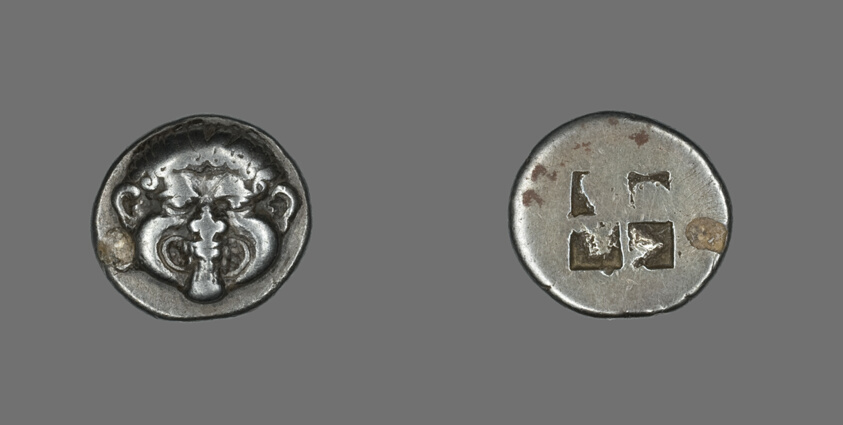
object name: Coin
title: Drachm (Coin) Depicting a Gorgon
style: greek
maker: Greek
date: early 5th century BCE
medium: Silver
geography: Greece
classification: coin; ancient art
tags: goddesses